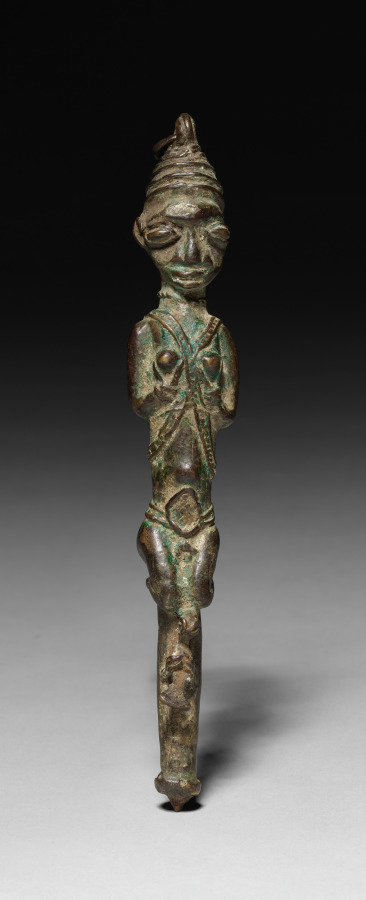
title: Pair of Ritual Staffs (ẹdan Ògbóni)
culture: Africa, West Africa, Nigeria, Yorùbá-style maker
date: 1800s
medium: Copper alloy and iron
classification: Sculpture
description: The chain connecting these two figures allows them to be worn in public by a member of the Ògbóni or Òṣùgbó association as authority emblems. The male on the right gives the association’s typical salute by clasping his left fist on the right one, while the female on the left holds her breasts as a sign of welcome and generosity. The use of copper alloy and iron expresses Ògbóni/Òṣùgbó's concerns with longevity and durability. Long iron spikes would have originally protruded from each figure's base.